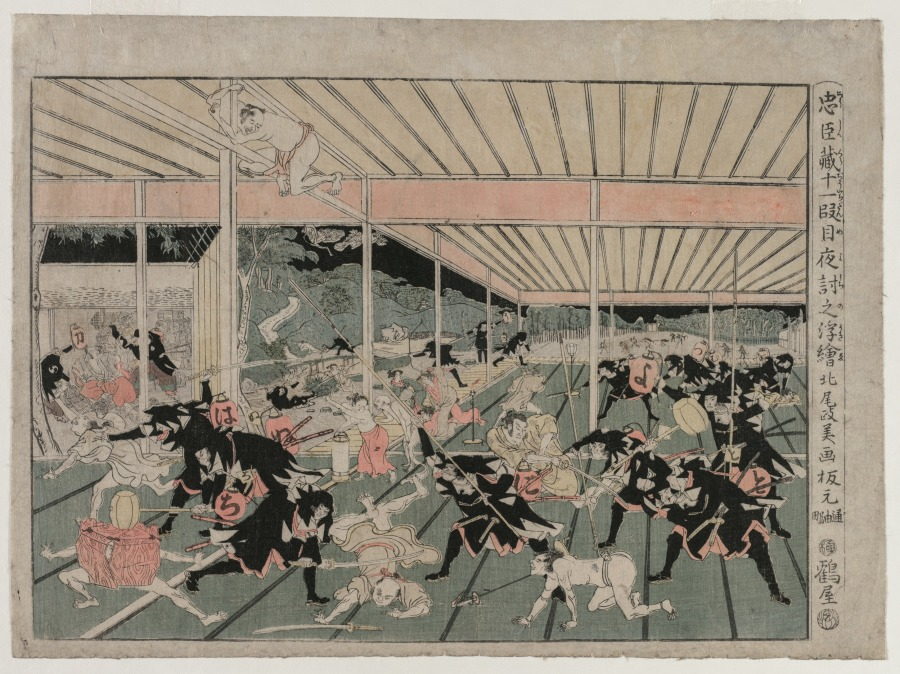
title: Chushingura: Act XI (from the series Perspective Pictures for The Treasure House of Loyalty)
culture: Japan, Edo period (1615–1868)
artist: Kitao Masayoshi (Japanese, 1761–1824)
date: c. 1790s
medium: color woodblock print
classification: Print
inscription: Signature: Kitao Masayoshi ga Publisher: Tsuruya Kiemon (hammoto Toriaburacho Tsuruya, emblem) Censorship Seal: kiwame